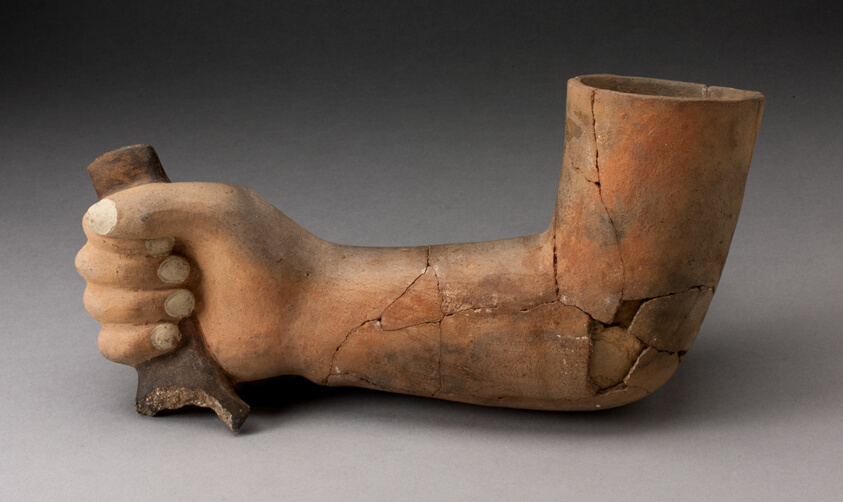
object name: Vessel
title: Vessel in the Form of an Arm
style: moche, Arts of the Americas, andes, south american, andean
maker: Moche (North coast, Peru)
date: 100 BCE–500 CE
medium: Ceramic and pigment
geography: Peruvian North Coast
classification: earthenware; ceramics; vessel; art of the americas